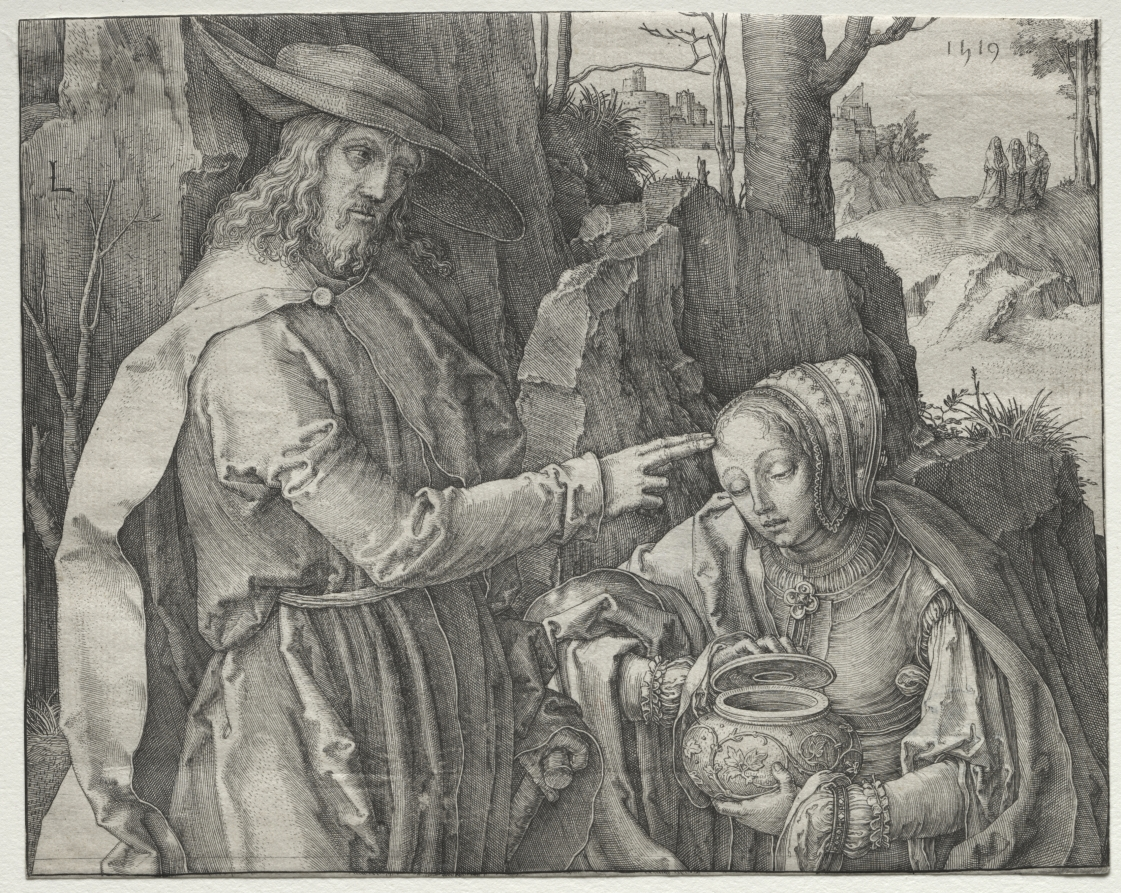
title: Christ as a Gardener Appearing to St. Mary Magdalen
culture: Netherlands, 16th century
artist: Lucas van Leyden (Netherlandish, 1494–about 1533)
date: 1519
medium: engraving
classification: Print